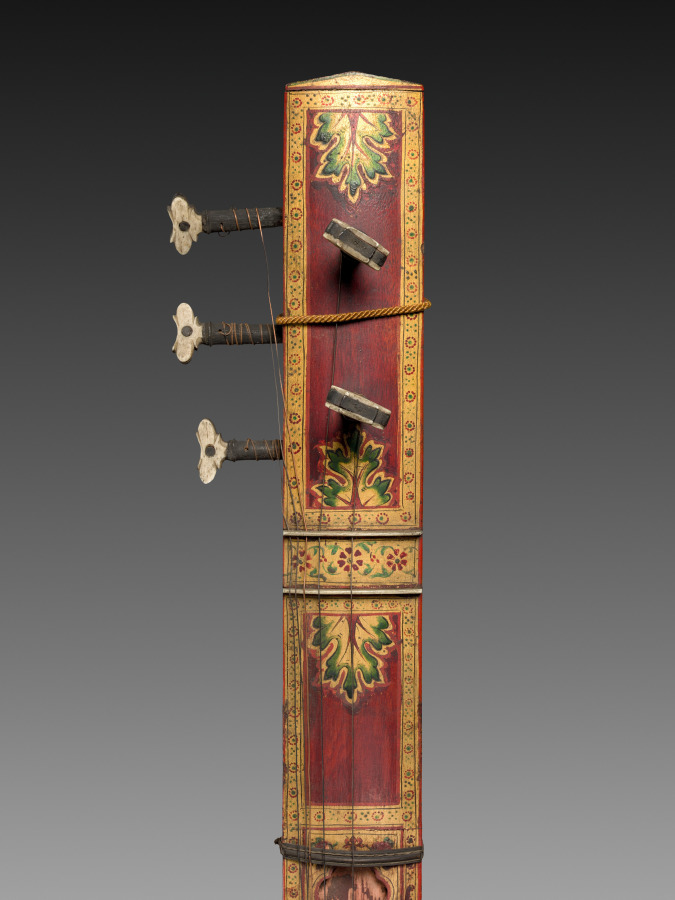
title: Sitar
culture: Eastern India, Bengal or Bangladesh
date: c. 1850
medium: Gourd and wood with pigment, ivory, and bone; copper alloy: frets; iron alloy: strings (with one modern copper replacement)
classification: Musical Instrument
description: The stringed instrument known as the sitar usually provided the central sound for the musical performances that were a constant feature of court life in India. The sitar could then be accompanied by percussion, voice, and other supporting instruments. In Raja Deen Dayal’s photograph Maharaja of Rewa in Prayer (2016.266.21), a musician strums a sitar in order to please the deities on the royal altar. The improvised compositions are played in a mode, or key, that correlates to the time of day and season of the year.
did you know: Many paintings of Indian court life depict female musicians holding and playing this kind of lightweight stringed instrument.